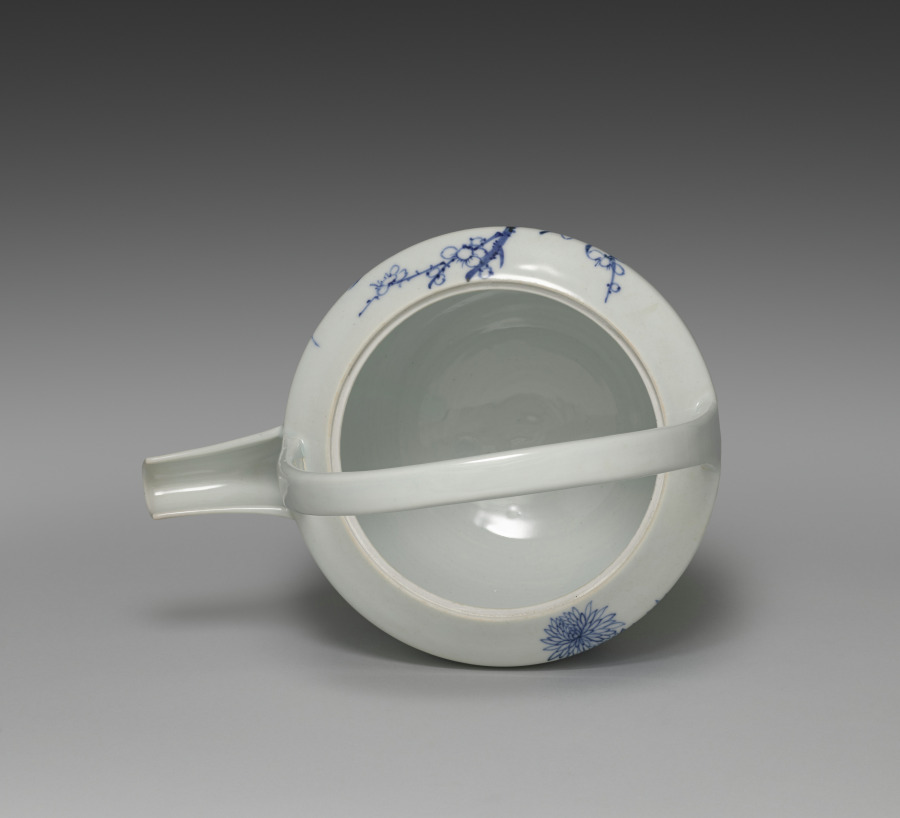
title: Sake Pourer with Chrysanthemum, Orchid, and Plum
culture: Japan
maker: Seifū Yohei III (Japanese, 1851–1914)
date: c. 1887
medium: Porcelain with underglaze blue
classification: Ceramic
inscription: Artist's signature in underglaze blue on the base.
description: This sake pourers has a wide basin with a low foot; a generous spout open across the top half; a flat, round lid with a small knob recessed flush to the top of the container; and a tall, arched handle that meets the container where the top joins the basin at a sharp angle. It has a painting in underglaze blue of the Four Nobles: chrysanthemum, orchid, plum, and bamboo. Unlike the creamy white color of some Yohei III works, the white of this sake pourer has the bluish cast typical of porcelains produced in Kyoto. It is signed in underglaze blue on the base.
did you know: This sake pourer is decorated with the Chinese theme of the Four Nobles, in which the qualities of a good person are represented by plant.